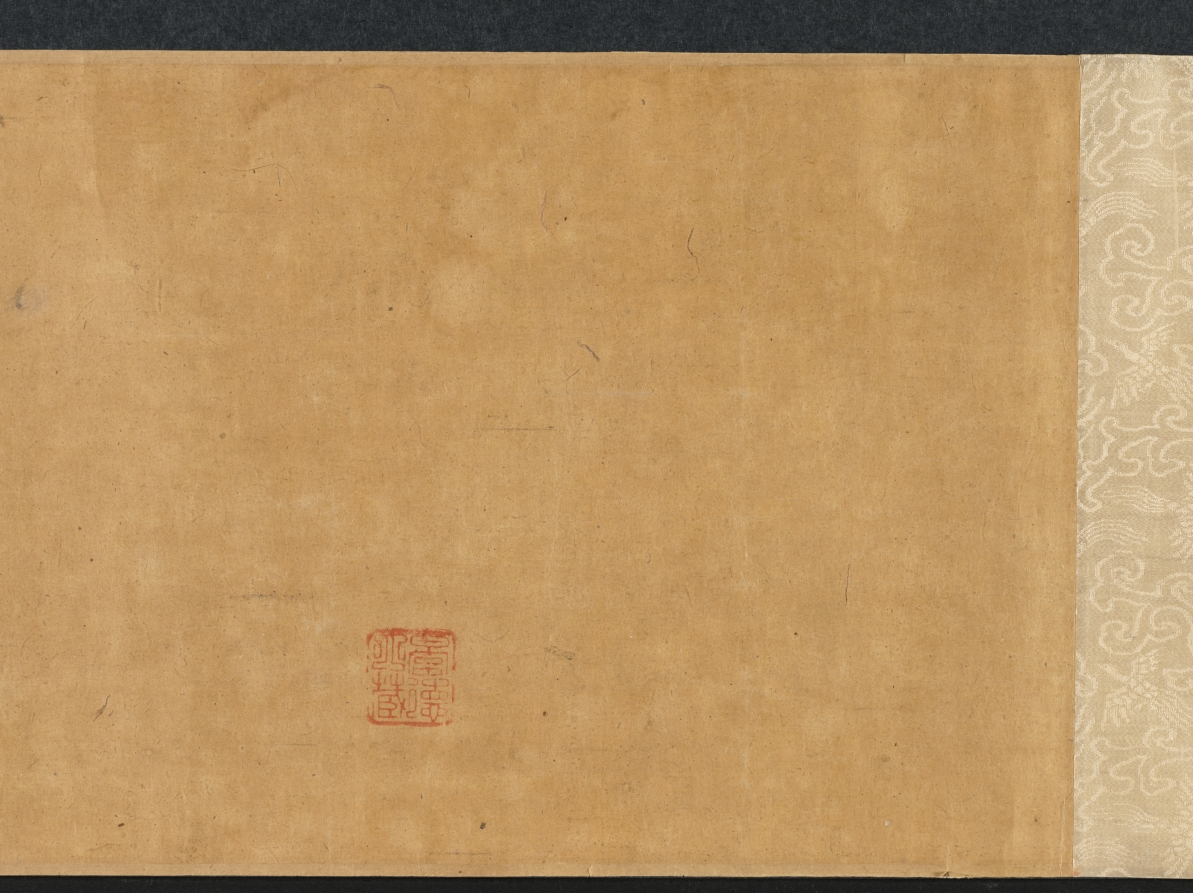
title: Zhao Mengfu Writing the Heart (Hridaya) Sutra in Exchange for Tea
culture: China, Ming dynasty (1368–1644)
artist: Qiu Ying (Chinese, 1494–1552)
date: 1542–43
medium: handscroll, ink and light color on paper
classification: Painting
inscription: Inscription accompanying text of "Heart" sutra, by Wen Zhengming 文徵明 (1470-1559): Zhengming 徵明, written in a boat at Kunshan 崑山, on the twenty-first day of the ninth month, in the renyin 壬寅 year, the twenty-first year of the Jiajing era [1542].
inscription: Colophon by Wang Shih-mou: Chou Yü-shün [Feng-lai] of K'un-shan was a scholarly, refined connoisseur of antiquities. He had acquired the poem written by Chao Ch'eng-chih [Chao Meng-fu] about the exchage of tea for Chao's calligraphy of the Prajna sutra. But the sutra itself, also written by Chao Meng-fu, is lost. He therefore asked Ch'iu Shih-fu [Ch'iu Ying] to do a painting and had Wen Cheng-ming, the artist-in-attendance, write the Hridaya Sutra in the "small, regular" style for replacement. Both works are so excellent that even Chao Meng-fu himself would certainly applaud if he should be reborn to see them. I, Shih-mou, had gotten possession of this scroll from the family of Chou Yü-shün, and since it was so wonderfully matched with one of the treasures in my collection. the Hridaya Sutra written by Chao Meng-fu for Priest Li in "running script," like the reuniting of two halves of a jade pi, I completed the scroll with the several colophons written for the "tea-exchange" poem. I did this because the painting of Ch'iu Ying and the calligraphy of Wen Cheng-ming are definitely masterpieces by themselves with absolutely no need to depend on any of the colophons written for the Chao Meng-fu poem. Furthermore, the two sons of Wen Cheng-ming, Shou-ch'eng [Wen P'eng] and Hsiu-ch'eng [Wen Chia]. have each written a colophon explaining the reason for replacing the calligraphy. As their writings are both acceptable for high standard, I didn't want to throw them away. [So by separating these into two scrolls] I was able to get two complete works of art in one clever stroke. I was quite pleased with myself, and hope that those who see this scroll shall not get suspicious because of the missing colophons. Wang Shih-mou wrote in his Jih-sun-chai study, on the first day of the tenth month, in the chia-shen year of the Wan-li era [1584].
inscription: Colophon by Wen P'eng: I-shao [Wang Hsi-chi] wrote in exchange for a flock of geese. Su Tung-po wrote in exchange for meat. Both episodes have become legends of a thousand years. Sung-hsüeh [Chao Meng-fu] "teased" Priest Kung for tea, and the story was immediately immortalized in the poems by all the famous scholars of the times. Indeed, how could one say his humor and elegance are not equal to the ancient worthies? Unfortunately, the poetry has survived but the writing of the sutra is lost. Yü-shün [Chou Feng-lai] therefore asked my father to make up the writing and so here is the complete work of art. Respectfully inscribed by Wen P'eng in the mid-summer of 1543.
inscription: Colophon by Wen Chia: Sung-hsüeh [Chao Meng-fu], in exchanging tea leaves for his writing of the Prajna, had put himself in the company of Yu-chün [Wang Hsi-chih] who exchanged geese for his writing of the Huang-t'ing sutra [the Yellow Chamber, or the Wai-ching ching, a Taoist text attributed to the Yellow Emperor]. However, was this romantic and cultivated gesture really intended for such small things? Actually, he was only proud that the excellence of his calligraphy had made him worthy to be the successor of the Ch'in Dynasty master. Since, very unfortunately, Chao Meng-fu's writing [of the Prajna] was already lost, my father therefore agreed to replace it, and did the calligraphy in the style of the Yellow Chamber. In addition, Yu-shün [Chou Feng-lai] had asked Mr. Ch'iu Shih-fu [Ch'iu Ying] to do a painting of the sutra writing story in the style of Li Lung-mien at the head of the scroll. Now it would seem the entire episode should go down in history for immortality. Respectfully recorded by Wen Chia, on the eighth day of the eighth month, in the year of k'uei-mao [1543]. trans. WKH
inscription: 4 colophons and 23 seals: 1 colophon, dated 1543, and 2 seals of Wen Peng (1498-1573); 1 colophon, dated 1543, and 2 seals of Wen Chia (1501-1583); 1 colophon, dated 1584, and 3 seals of Wang Shih-mou (1536-1588); 2 seals of Chou Feng-lai (16th c.); 3 seals of Sung Lo (1634-1713); 5 seals of the Ch'ien-lung emperor (r. 1736-95); 1 colophon, dated 1902, and 1 seal of Fei Nien-tz'u (1885-1905); 4 seals of Wan-go H. C. Weng (b. 1918); 1 seal unidentified.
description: The Yuan dynasty calligrapher Zhao Mengfu (1254–1322) is said to have transcribed the Heart Sutra for a certain priest named Li in exchange for tea. Later, during the Ming dynasty, the professional painter Qiu Ying from Suzhou painted this scene for his patron. Here, Zhao Mengfu holds a brush and has a piece of paper laid out before him. On the table is an ink stone, an ink stick, and a small water dropper. Drops of water would dissolve the ink stick into liquid ink when it was ground on the flat square stone.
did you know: Qiu Ying was born to a peasant family, but his natural talent led him to a successful career as a professional painter with wealthy patrons.